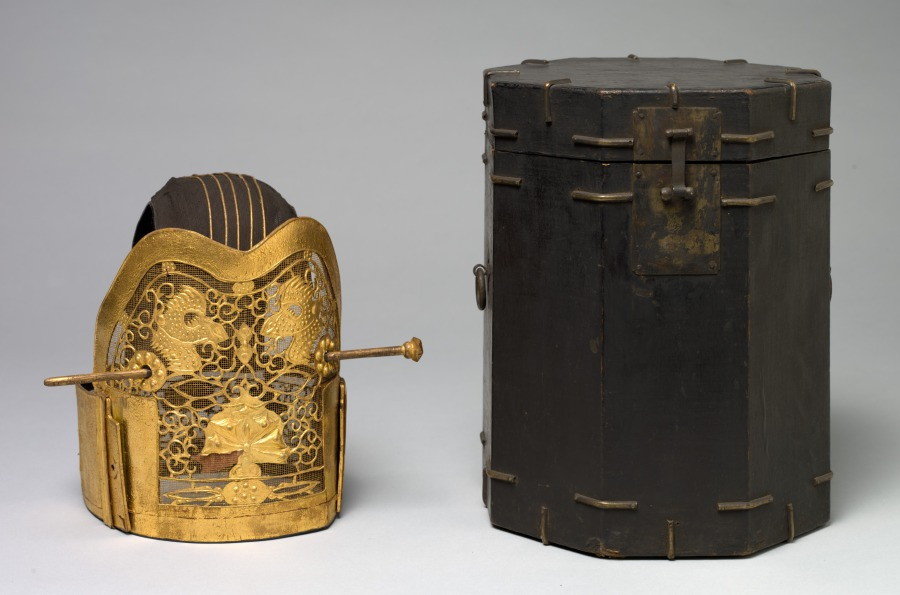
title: Crown for the Royal Ceremonial Costume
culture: Korea, Joseon dynasty (1392–1910)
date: late 1800s–early 1900s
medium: gilded paper, metal wire, and black silk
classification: Garment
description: This is a set of royal ceremonial robe and accessories worn by a high-ranking court official for attending special state ceremonies. The set consists of an inner coat, an outer coat, a skirt, a back apron, a crown, a pair of jade tassels, a tablet, and a belt.